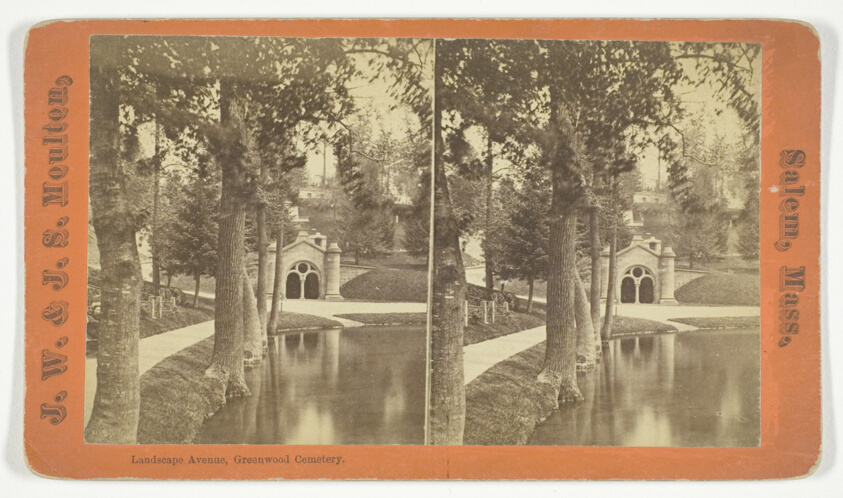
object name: Photograph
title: Landscape Avenue, Greenwood Cemetary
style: 19th century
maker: J.W. & J.S. Moulton (Americans, active 1873-1881)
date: 1873/81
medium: Albumen print, stereo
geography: Salem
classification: photography; photograph